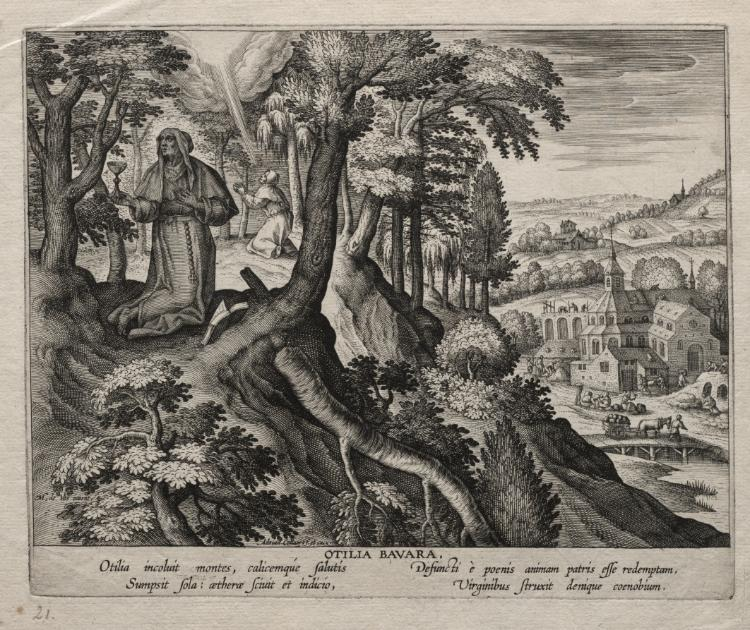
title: Otilia Bavara (Saint Otilia of Bavaria)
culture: Flanders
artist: Adriaen Collaert (Flemish, 1560–1618)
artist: after Maarten de Vos (Flemish, 1532–1603)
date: c. 1580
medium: engraving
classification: Print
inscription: lower margin, in graphite: 21